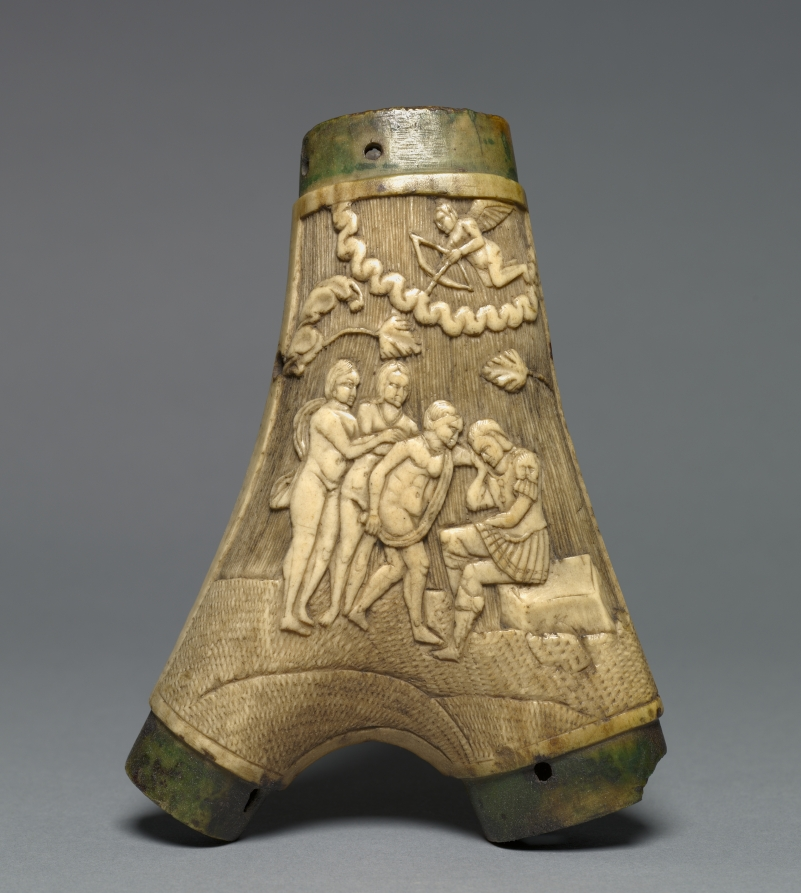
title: Powder Flask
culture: Austria (?) or Germany, 16th century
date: c. 1550–1580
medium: staghorn (two branches) with carved relief scene of the Judgement of Paris, mounts missing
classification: Arms and Armor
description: Powder flasks are small, portable containers designed to hold gunpowder. From the 1400s to the 1800s, powder flasks were indispensable for charging and priming firearms of all types. Without powder flasks firearms were of little use to their owners. Many highly decorated flasks rank as works of art. During the 1500s, they were frequently decorated with images of famous historical figures. Here the figures of the Judgment of Paris come from Greek antiquity.